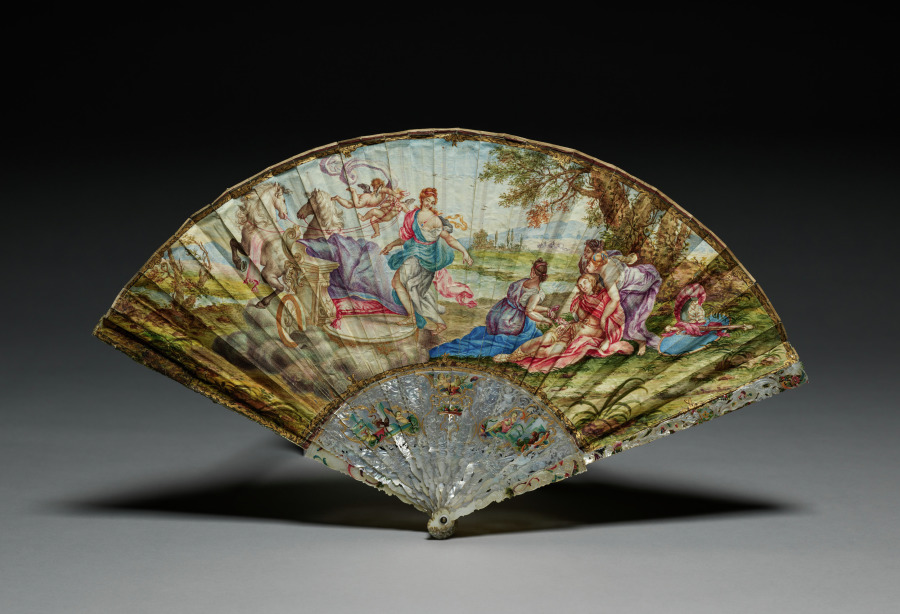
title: Folding Fan: Departure of Aurora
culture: Italy, Naples (?), 18th century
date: c. 1750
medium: leaf: gouache on skin; frame: mother-of-pearl and wood with painted decoration in relief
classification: Miscellaneous